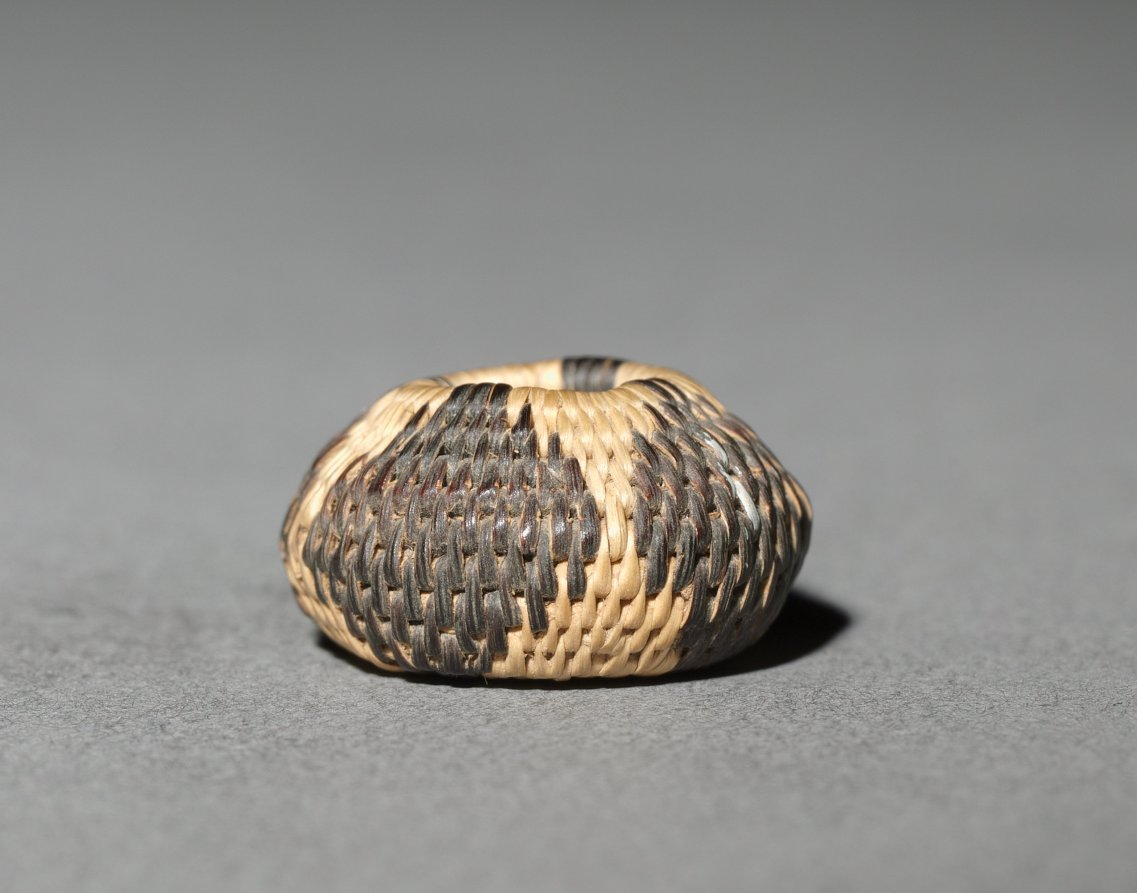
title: Miniature Basket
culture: America, Native North American, Southwest, Arizona, Akimel O'odham (Pima), Unassigned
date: before 1923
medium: plant fiber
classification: Basketry